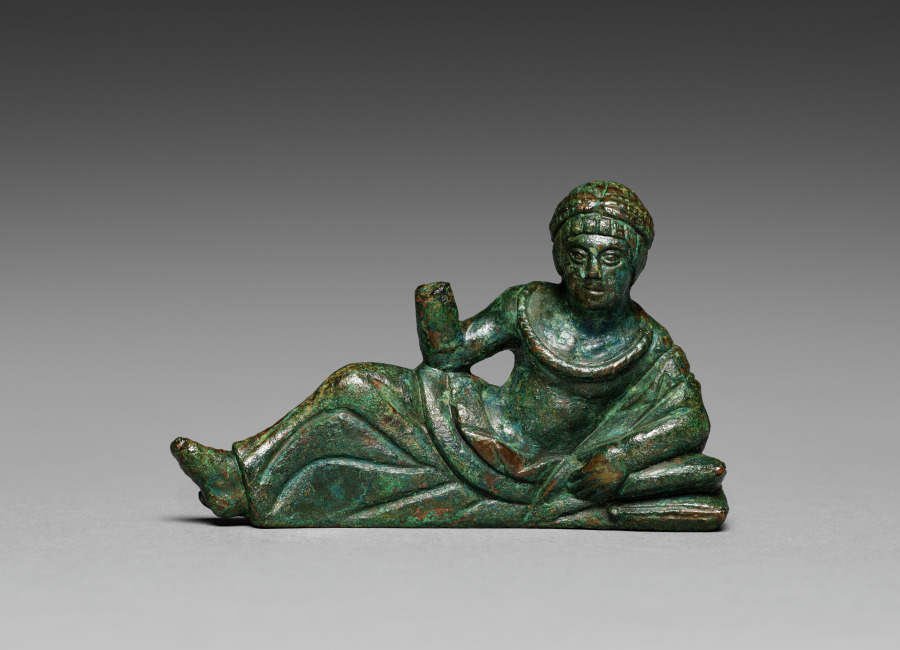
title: Vessel Ornament of Banqueter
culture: Etruscan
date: probably 400–375 BCE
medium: bronze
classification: Sculpture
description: This bronze banqueter figurine was one of six once adorning the rim of a large basin, now lost. Cast in molds with individualized details, most have grooves on their underside to attach to the basin. Minute traces of gilding remain on areas of clothing and skin (mostly visible only under magnification), suggesting that they may have been completely gilded. Two handles in the form of hippocampi, horses with serpentine tails, also belonged to the basin and are now displayed at the Michael C. Carlos Museum at Emory University. The basin may have been used to hold liquid for a banquet, or was perhaps funerary. This reclining bronze figurine’s left arm rests on the drapery covering his shoulder. His right arm is raised and broken at the wrist. Garlands rest on his head and chest. Traces of gilding remain in the garlands and drapery folds. The figurine is very similar to 1987.157, suggesting that he may have held a phiale mesomphalos, a shallow bowl used for wine libations to the gods.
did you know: Representations like this figurine suggest that Etruscan banqueters may have worn garlands made of flowers or leaves.